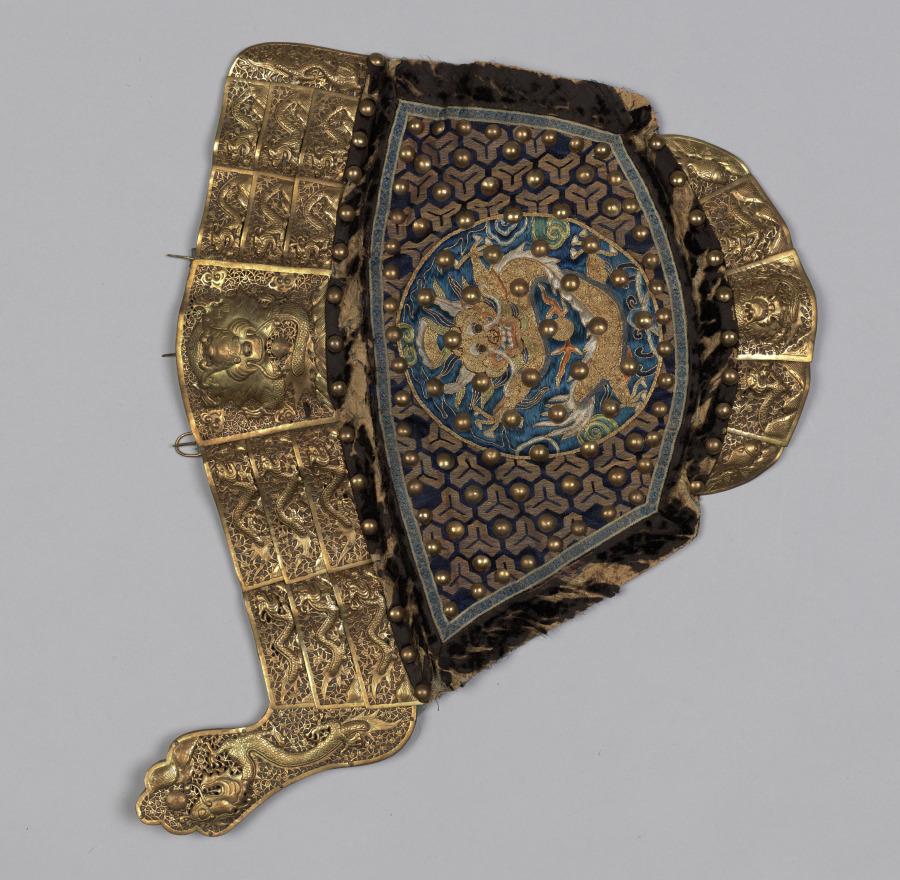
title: Ceremonial Uniform: Left Shoulder Flap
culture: China, Qing dynasty (1644-1911)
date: 1644–1911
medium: satin weave silk with gold metal thread embroidery; supplementary weft; black velvet; metal (brass?); lined in blue silk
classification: Arms and Armor